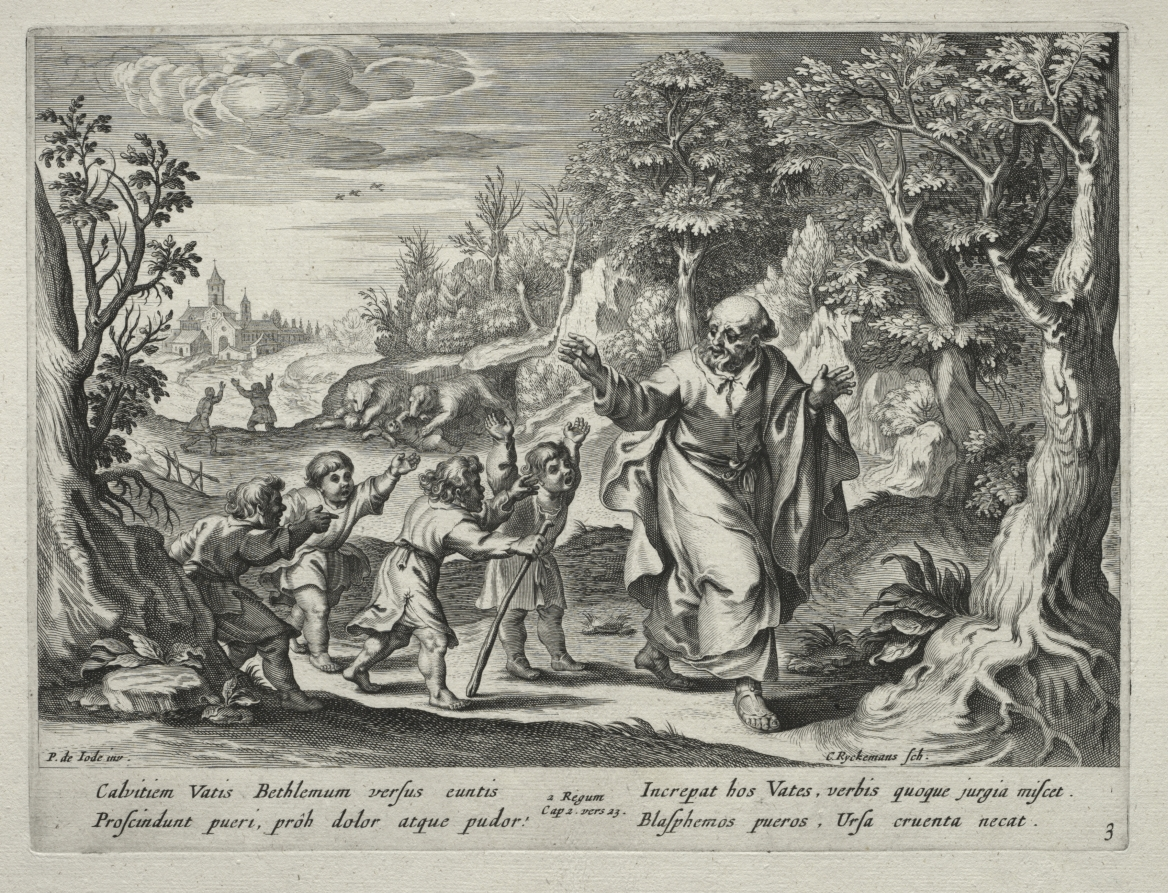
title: The Story of Elisha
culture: Flanders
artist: Nicolaes Rijckmans (Flemish, 1616-)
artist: after Pieter I de Jode (Flemish, 1570–1634)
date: 1643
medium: engraving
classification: Print